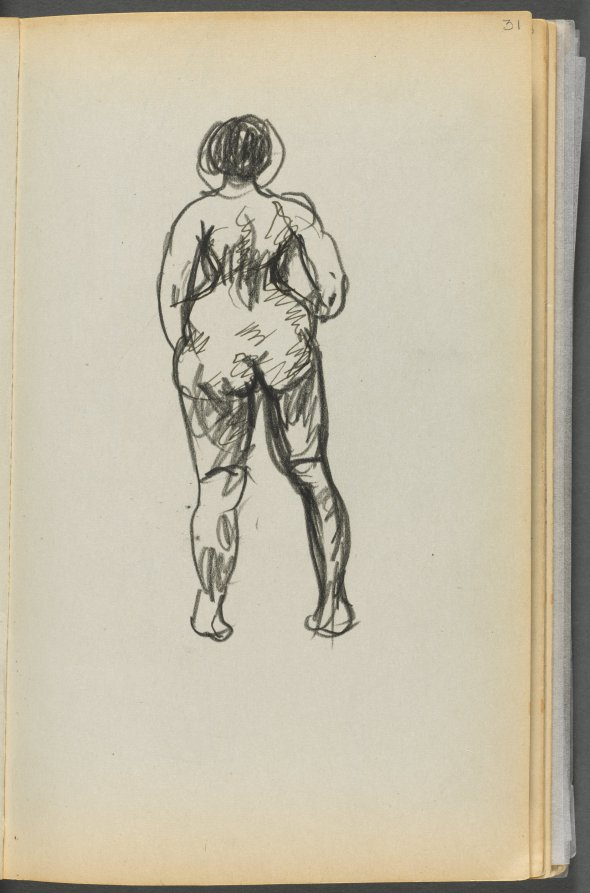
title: Sketchbook- The Granite Shore Hotel, Rockport, page 031: Female Nude seen from the back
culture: America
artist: Maurice Prendergast (American, born Newfoundland [now Canada], 1858–1924)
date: 1905–10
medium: graphite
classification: Bound Volume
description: This sketchbook contains 72 pages of pencil drawings and 9 watercolors of Cape Ann. On the inside of the cover Prendergast wrote the address of the Granite Shore Hotel in Rockport, Massachusetts.